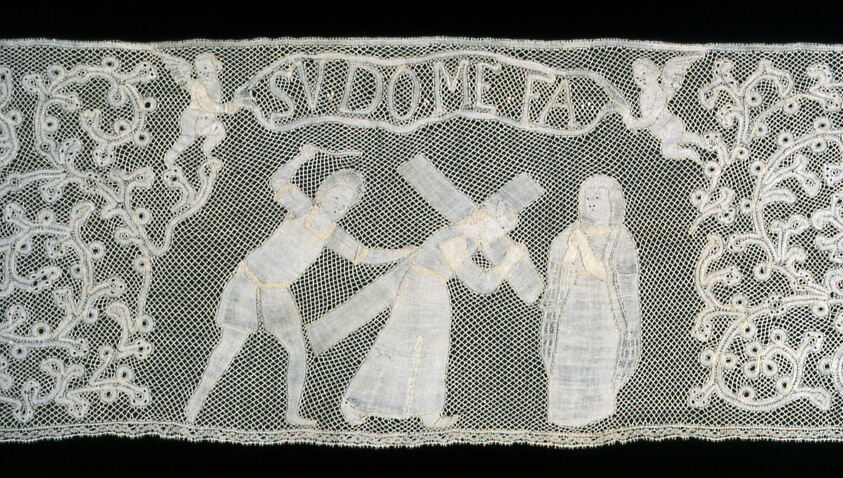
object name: Textile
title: Border (From an Altar Cloth)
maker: Italy, Milan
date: 1725/75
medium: Linen, bobbin part lace; embellished with glass beads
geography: Milan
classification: textile; lace - bobbin